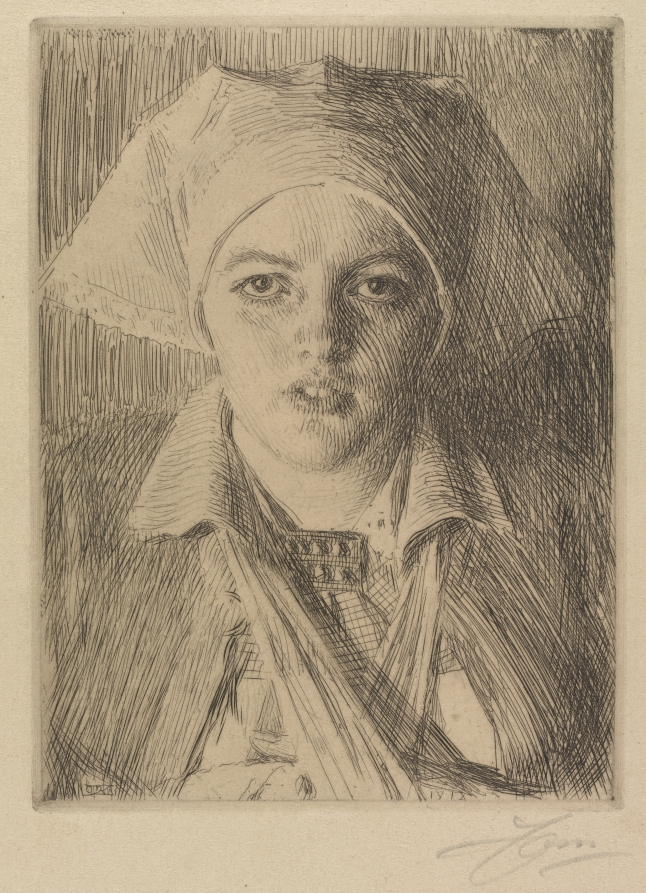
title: Gulli II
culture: Sweden, 20th century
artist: Anders Zorn (Swedish, 1860–1920)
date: 1918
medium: etching and drypoint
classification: Print